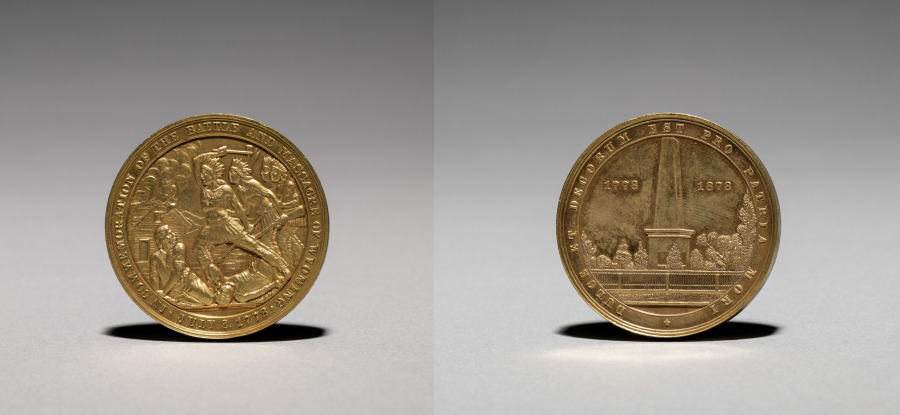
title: Medal: In Commemoration of the Battle and Massacre of Wyoming, 3 July 1778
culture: America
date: 1878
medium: gilt bronze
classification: Metalwork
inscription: In commemoration of the battle and massacre of Wyoming, July 3, 1777.